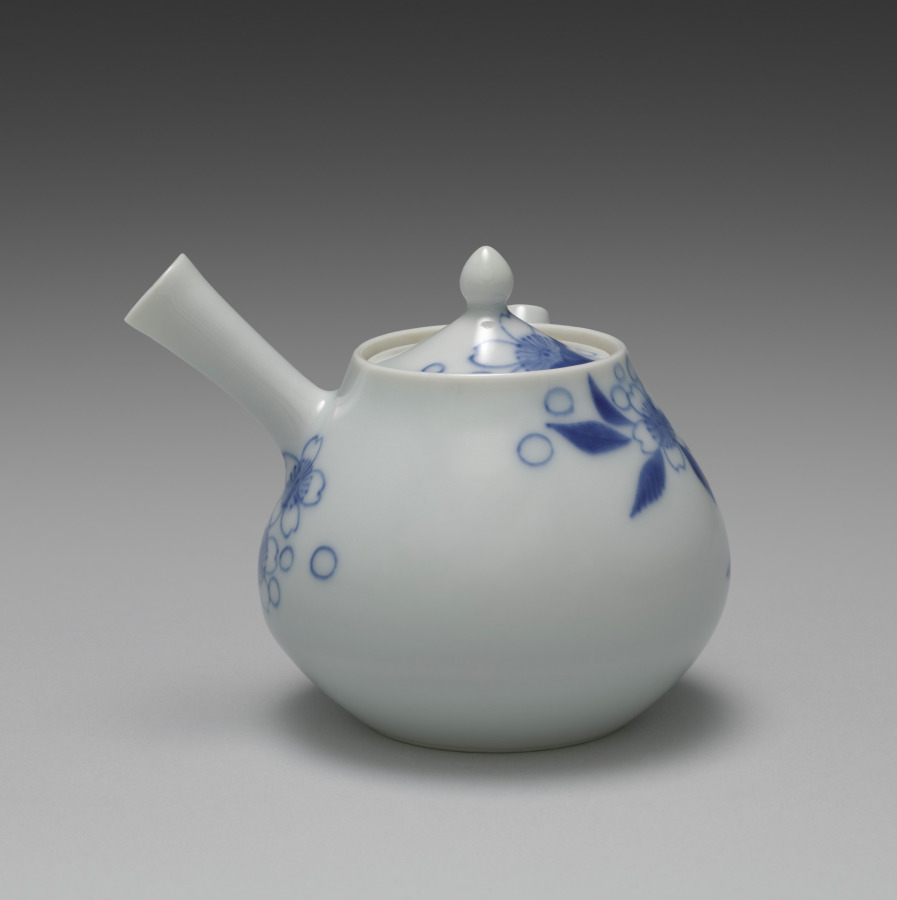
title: Teapot with Cherry Blossoms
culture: Japan, Taishō period (1912–26) or Shōwa period (1926–89)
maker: Seifū Yohei IV (Japanese, 1872–1951)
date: 1914–46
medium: Porcelain with underglaze blue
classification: Ceramic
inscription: 清風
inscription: 清風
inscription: 清風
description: This teapot with mountain cherry blossom motifs has its design in underglaze cobalt blue. It runs over both the pear-shaped body and the recessed lid, with its pointed, jewel-shaped handle. There is a faint bluish-green tint to the glaze. The mark impressed into the base of this work appears to be one used by Yohei III. However, the box inscription is brushed in a hand matching that of Yohei IV, and while the seal on the lid is one often used by Yohei III, that next to the signature on the back of the lid is one generally used by Yohei IV. The signature, too, resembles others belonging to Yohei IV. As the design, technique, and object named on the box accurately describe the contents, it seems unlikely, but not impossible, that it is mismatched. There are many cases in which Yohei III works are contained in boxes with inscriptions, seals, and a signature by Yohei IV. However, in such examples, Yohei IV clearly identifies himself as authenticating the work of his father and often includes his father’s Imperial Household Artist seal. This may be an example of a transitional piece in which Yohei IV has used his father’s mark on the base of his own work.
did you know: Cherry blossoms mark the arrival of spring, and their short-lived beauty is deeply anticipated and appreciated.